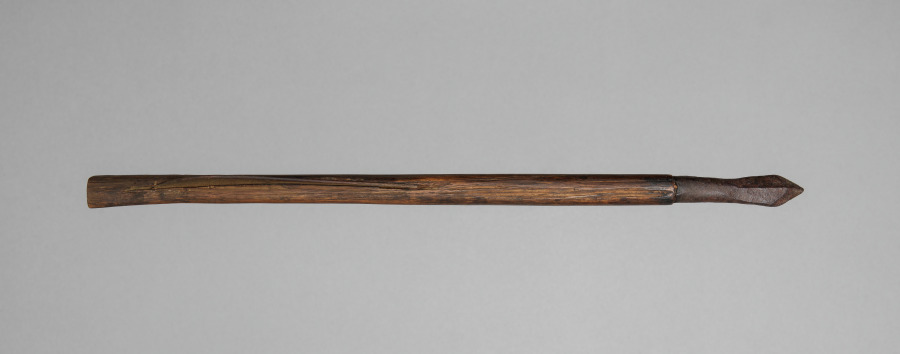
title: Crossbow Bolt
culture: Germany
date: 1500s-1600s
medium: wood, leather, steel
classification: Arms and Armor